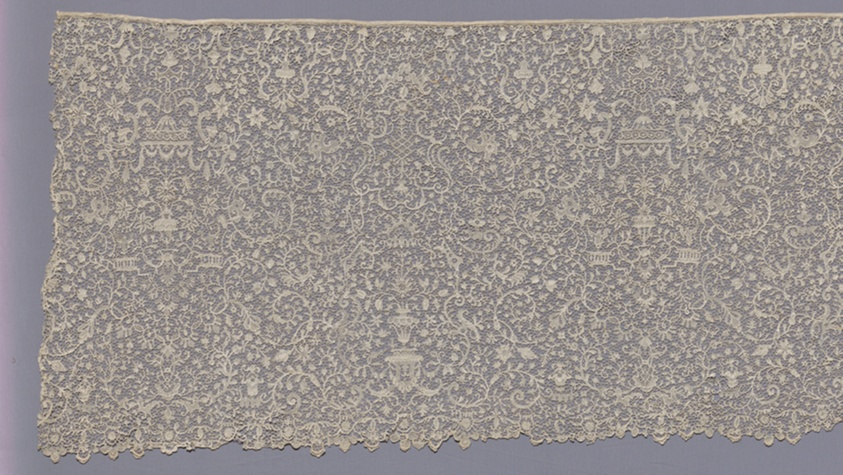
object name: Textile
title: Flounce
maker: France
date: c. 1700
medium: Linen, needle lace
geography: France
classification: textile; lace - needle